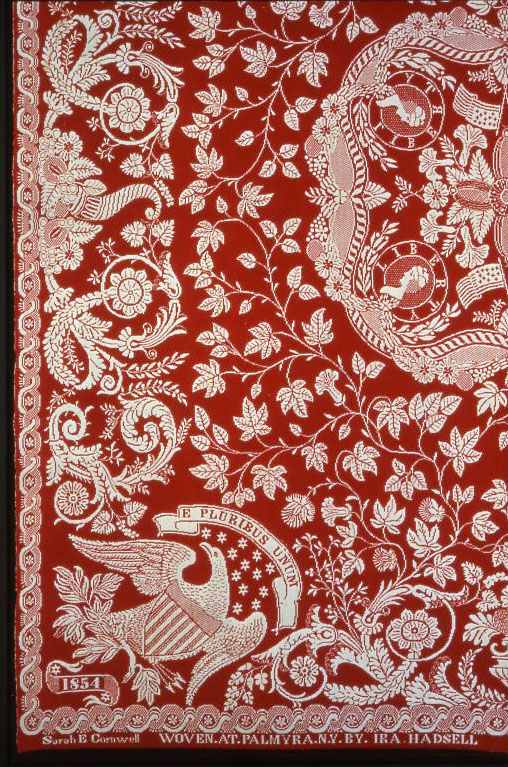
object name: Textile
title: Coverlet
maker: Ira Hadsell (American, 1813-1896); United States, New York, Wayne County, Palmyra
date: 1854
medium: Cotton and wool, plain weave double cloth; woven on loom with Jacquard attachment; full loom width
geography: New York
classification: textile; coverlet; weaving - coverlet; weaving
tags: coverlet